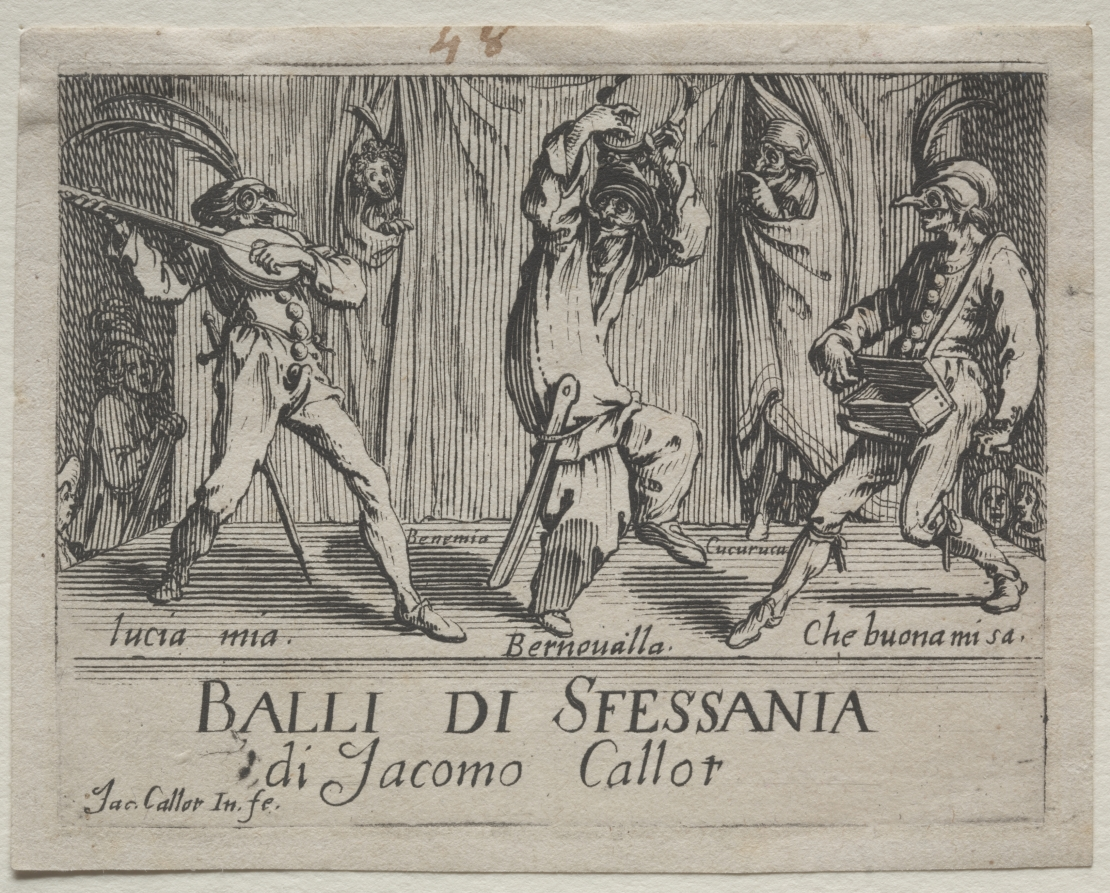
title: Frontispiece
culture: France, 17th century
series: Balli di Sfessania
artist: Jacques Callot (French, 1592–1635)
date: 1621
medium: etching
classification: Print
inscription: center, in plate(below figures poking through the curtains): Benemia Cucurucu ; across bottom, in plate(below three main figures): lucia mia. Bernoualla. Che buona mi sa. ; across bottom, in plate(in margin): BALLI DI SFESSANIA / di Jacomo Callot / Jac. Callot In. fe. ; upper center, in pen and brown ink: 48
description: This is the title page from a series of 24 etchings connected with the commedia dell'arte, a form of comic theater developed in Italy during the 1500s. The actual title and inscriptions are related to a carnival song and dance from Naples.